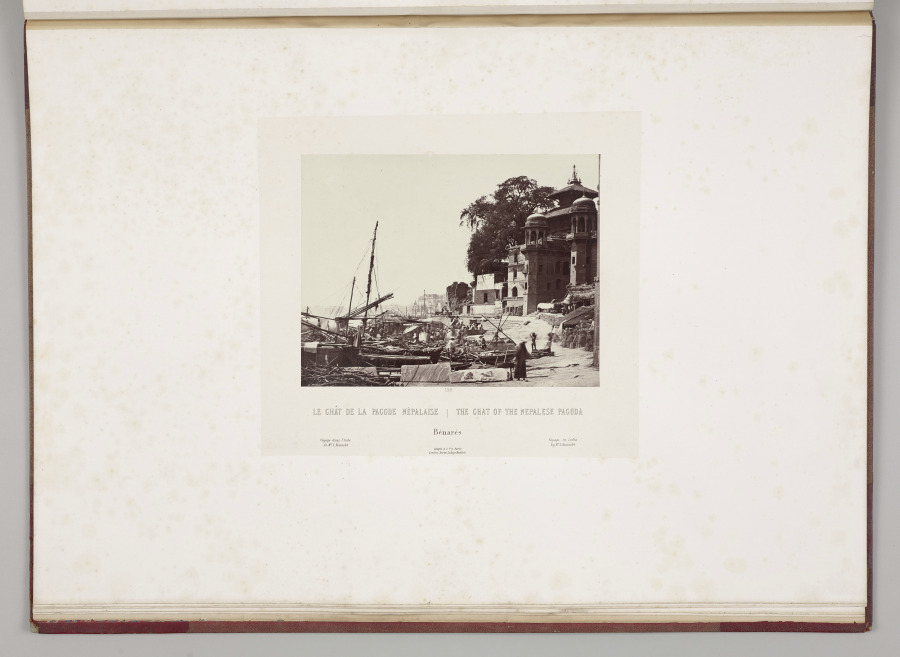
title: The Ghat of the Nepalese Pagoda, Bénarès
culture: France, 19th century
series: India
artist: Louis-Théophile Marie Rousselet (French, 1845–1929)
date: 1865–68, published 1869–70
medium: Albumen print from glass plate negative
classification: Photograph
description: Concerned that his drawings did not do justice to the splendor of India’s monuments, Rousselet learned photography in India that year, a remarkable accomplishment. He proved to be a talented photographer with a sophisticated sense of composition. The scenes in this volume sweep across sites of Sultanate, Rajput, and Mughal power in northern India, from the sacred Hindu city of Varanasi on the Ganges River to Alwar in Rajasthan. Also included are several scenes of industry and portraits of Indian rulers.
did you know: Louis Rousselet described himself as a “scientific traveler” when he went to India alone at age 18 in 1863 and stayed into 1868.